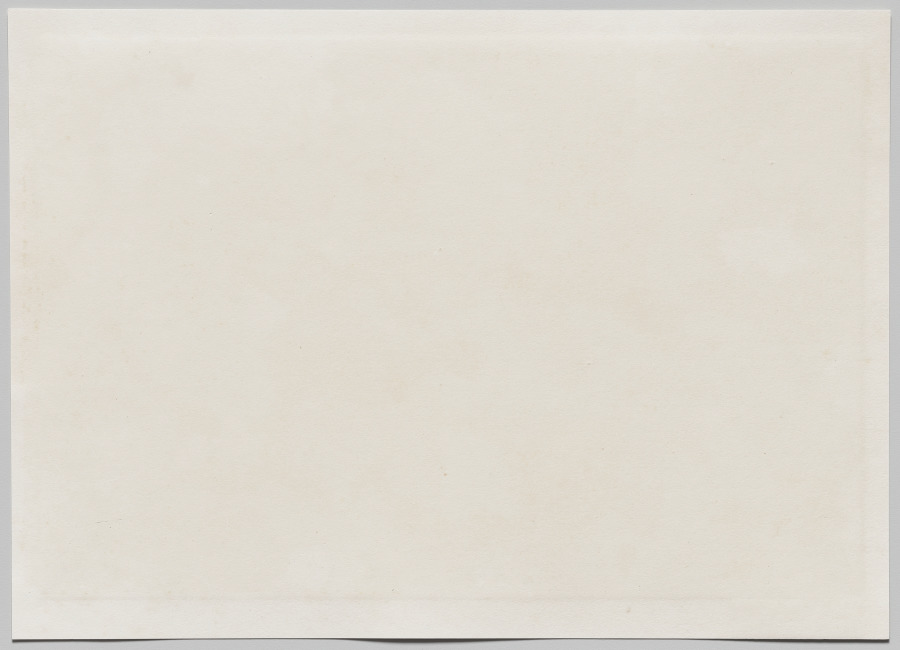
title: Palace of the Nuns at Uxmal (detail from the façade of the snake)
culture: France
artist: Claude-Joseph-Désiré Charnay (French, 1828–1915)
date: c. 1860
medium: albumen print from collodion negative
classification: Photograph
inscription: Imprinted in paper label adhered to recto, lower left: "Charnay, photogr. Pl. 41. Gide, éditeur, Paris./PALAIS DES NONNES, A UXMAL/Détail de la Façade de la Couleuvre"